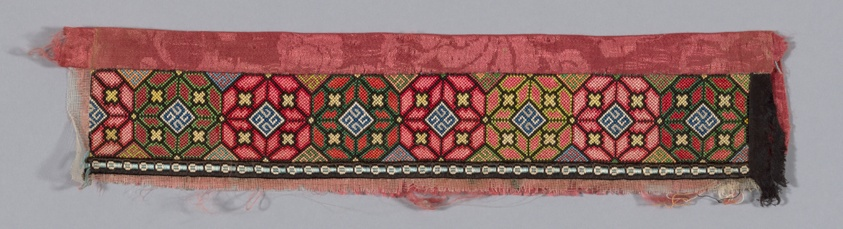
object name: Costume and Accessories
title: Trouser Band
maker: Han-Chinese (China)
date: Qing dynasty (1644–1911), 1875/1900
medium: Forty-four pairs and eight odd pieces of embroidered sleeve, ankle bands, etc. on gauze.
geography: China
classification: textile; embroidery; costume - embroidery; costume